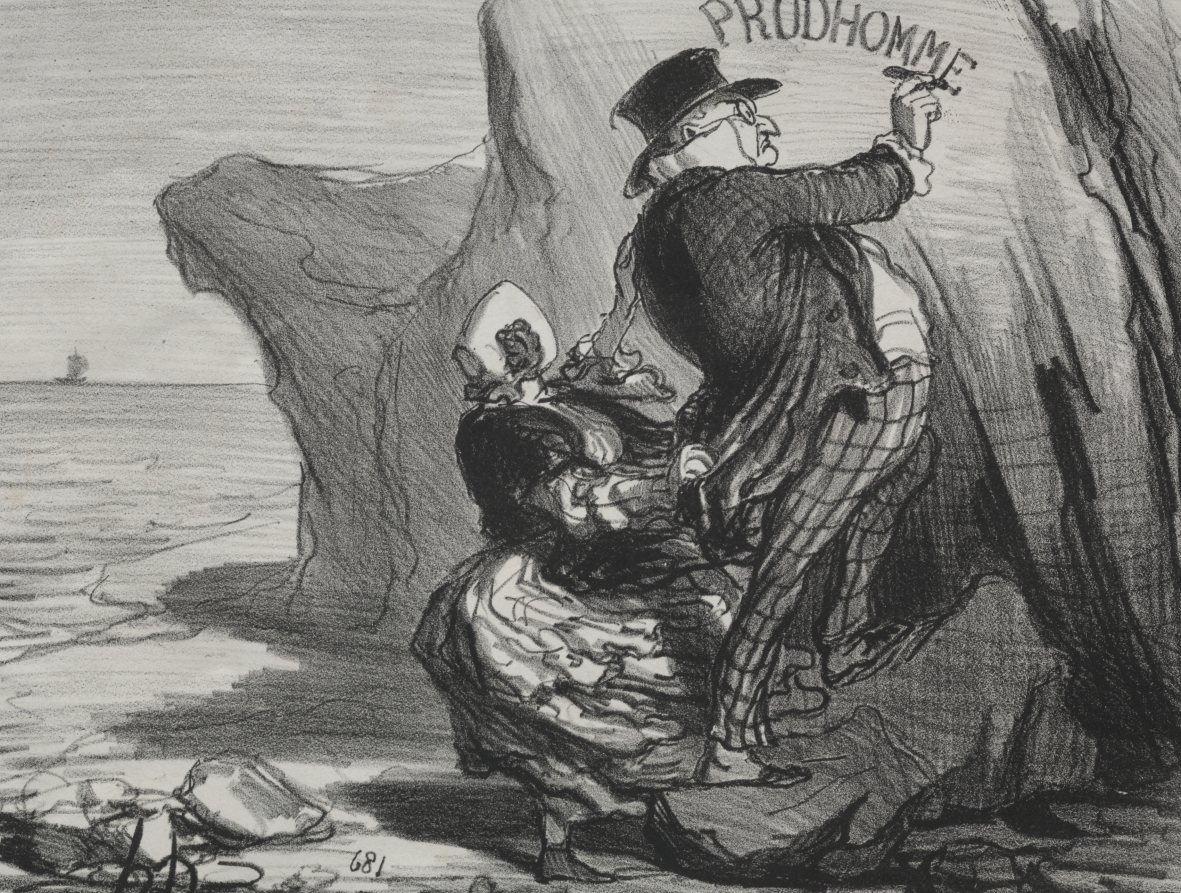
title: I want to leave an imperishable monument of our visit to this cliff...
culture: France, 19th century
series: The Good Bourgeois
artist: Honoré Daumier (French, 1808–1879)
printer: Destouches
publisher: Mon. Martinet, r. Rivoli, et 41 r. Vivienne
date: 1854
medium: lithograph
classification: Print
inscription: Above image, printed: LES BONS BOURGEOIS. / 2 ; Below image, printed: -Je veux laisser un monument impérissable de notre visite à cette falaise..... j'ajouterai aussi votre nom, Adélaïde, le respect que je professe pour le beau sexe / m'en fait un devoir.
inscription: Lower margin, printed: Maison Martinet, 116, r. Rivoli et 41, r. Vivienne / Lith Destouches, 28, r Paradis Pre. Paris. ; [in pencil]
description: This print was published in Le Charivari (October 9, 1854) as plate 2 from the series The Good Bourgeois.